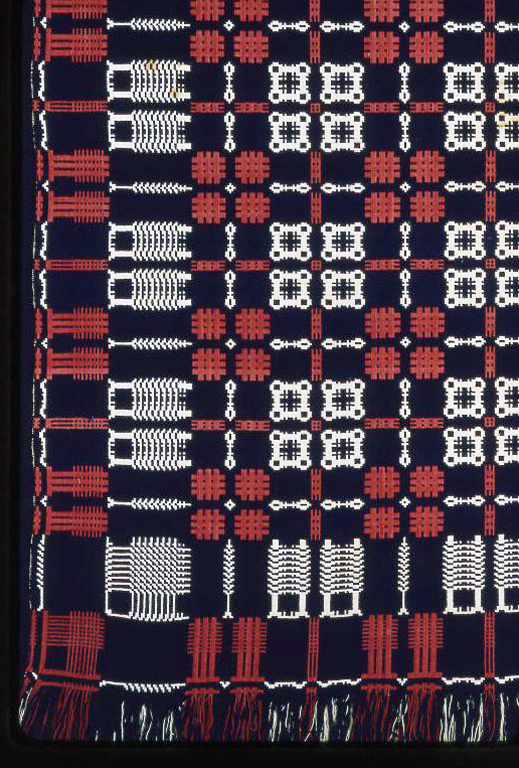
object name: Textile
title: Coverlet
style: 19th century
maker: United States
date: 1825/30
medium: Cotton and wool, plain weave double cloth; main warp fringe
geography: United States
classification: weaving - coverlet; coverlet; weaving; textile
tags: geometric motif, grids, pine trees, geometric, coverlet